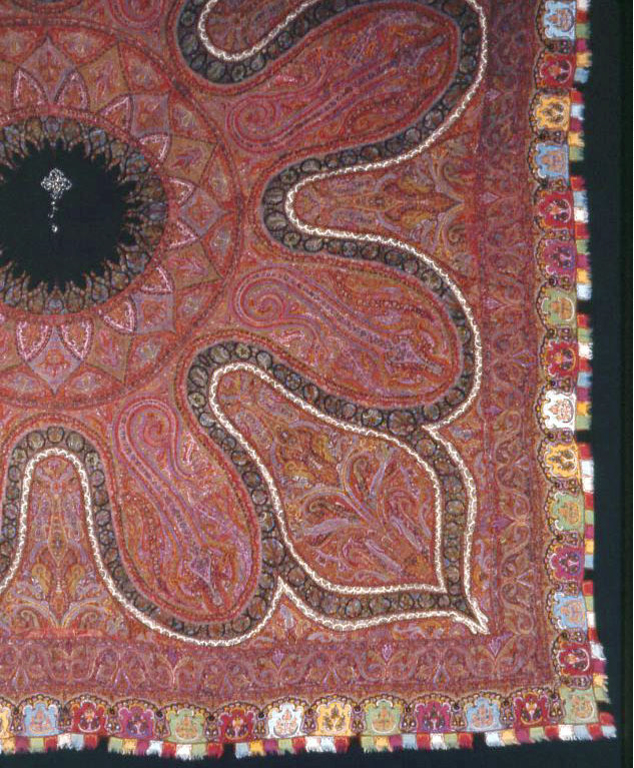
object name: Costume and Accessories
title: Shawl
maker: India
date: 1867/75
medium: Wool, patchwork of double interlocking 2:2 'S' twill tapestry weaves; outer border and "Harlequin" tabs of patchwork in 2:2 'S' twill weaves; embroidered in detached chain, flat, fly, Roumanian, and stem stitches; laid work and couching; main warp fringe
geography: India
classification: textile; weaving; costume